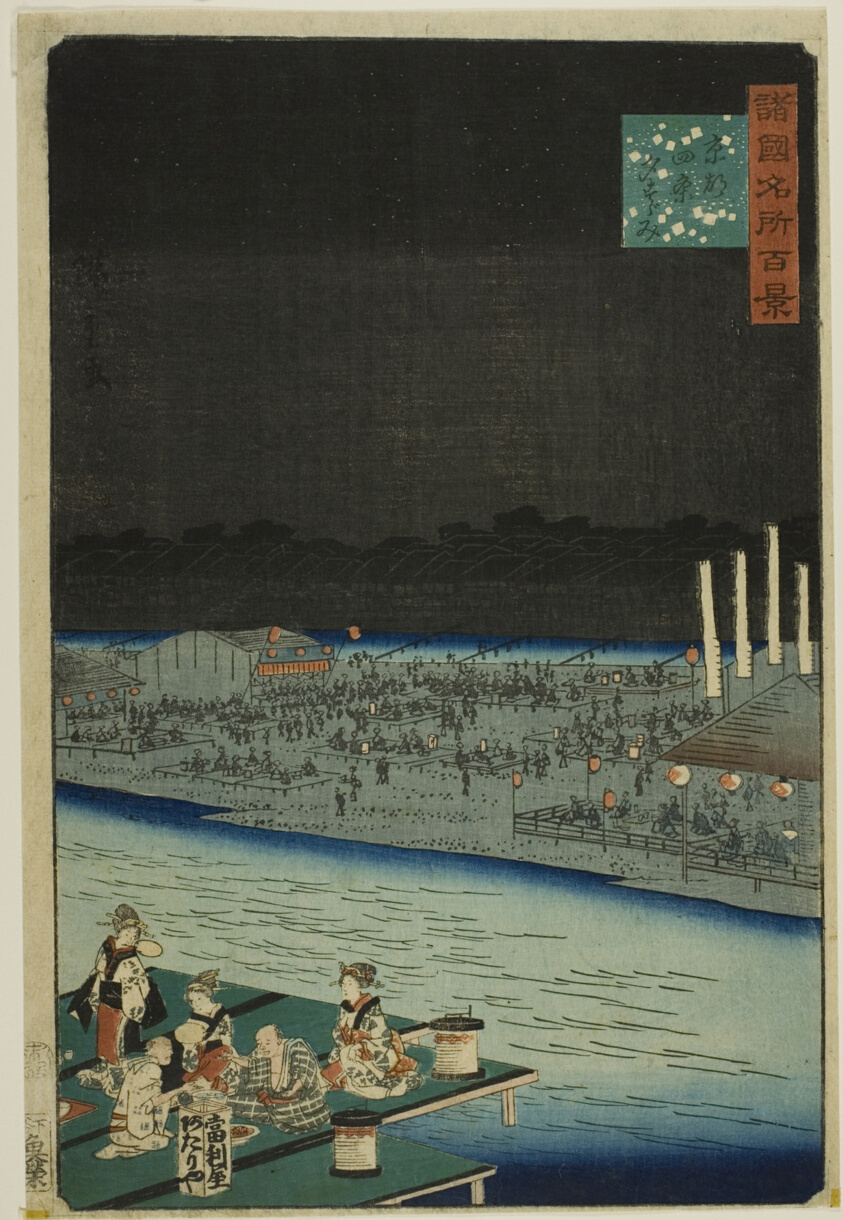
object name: Print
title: Enjoying the Cool in the Evening at Shijo, Kyoto (Kyoto Shijo yu suzumi) from the series “One Hundred Famous Views in the Various Provinces (Shokoku meisho hyakkei)”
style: Japanese (culture or style)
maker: Utagawa Hiroshige II (Shigenobu) (Japanese, 1826–1869)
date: 1859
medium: Color woodblock print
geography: Japan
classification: woodblock print; print